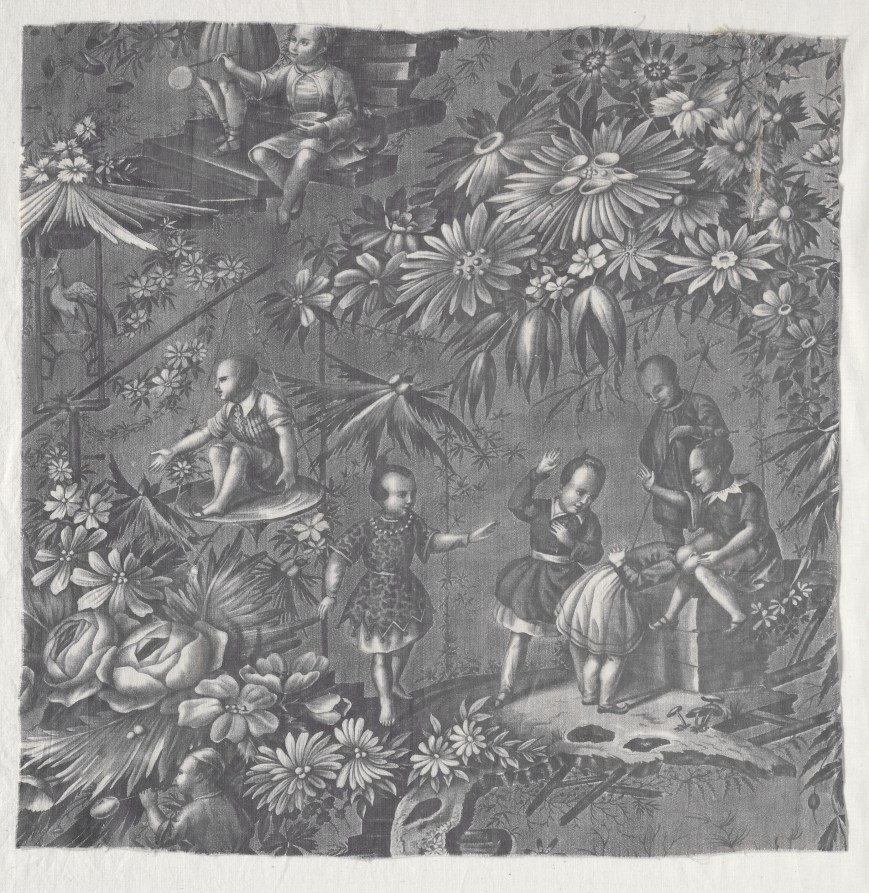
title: Copperplate Printed Textile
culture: France, Alsace ?, 19th century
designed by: George Zipelius (French)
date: 1825–1830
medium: copperplate printed cotton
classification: Textile